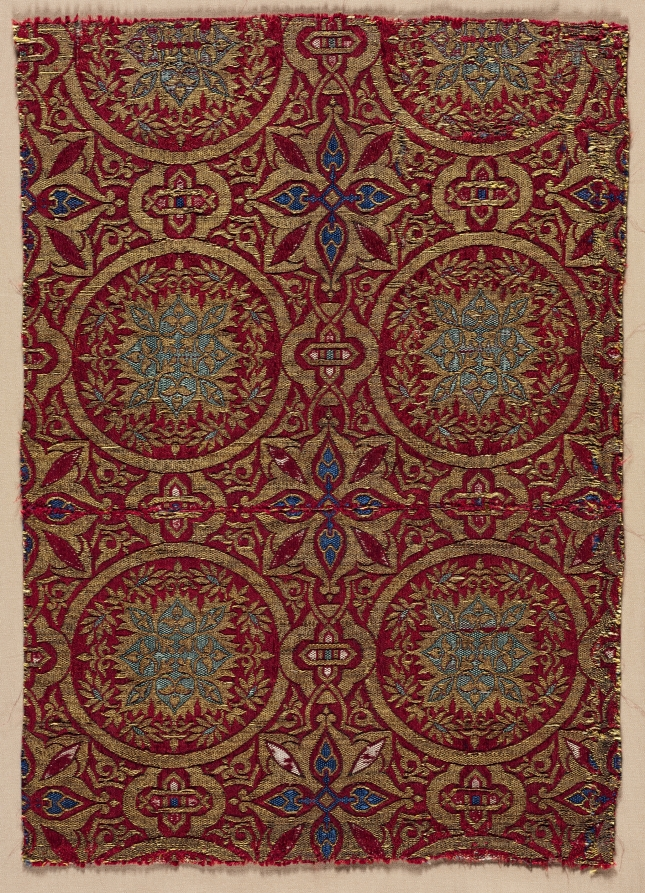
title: Lampas with foliate roundels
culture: Spain, Granada, Nasrid period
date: 1300s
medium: lampas: silk and gold thread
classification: Textile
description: This textile shows the development of the Hispano-Moresque style in the 1300s. The bright green, blue, white, and gold design against a rich red ground produces a jewel-like quality that was not seen again after the end of the century.